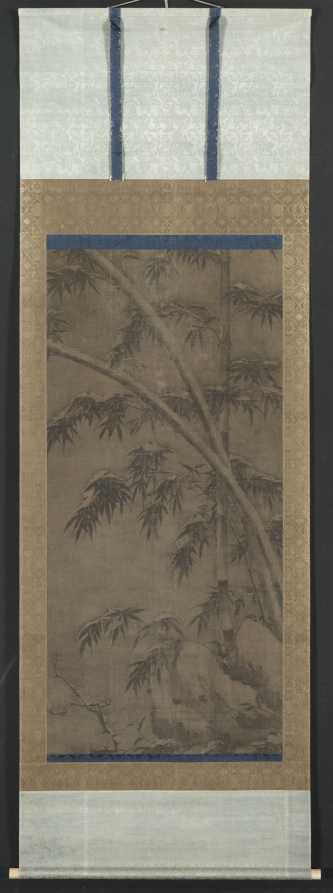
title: Bamboo in Four Seasons: Winter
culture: China, Yuan dynasty (1271-1368)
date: 1279–1368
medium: hanging scroll; ink on silk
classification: Painting